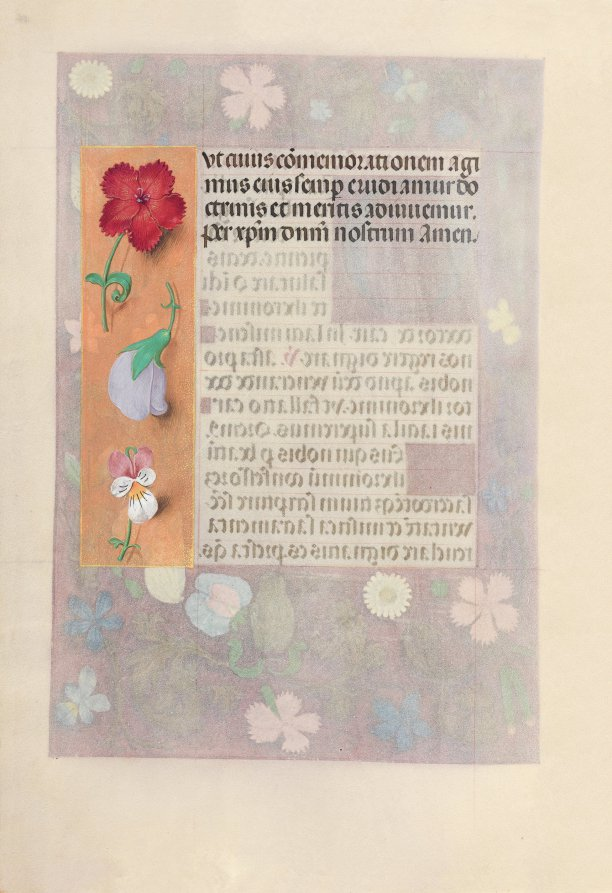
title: Hours of Queen Isabella the Catholic, Queen of Spain: Fol. 186v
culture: Flanders, Ghent and Bruges, late 15th century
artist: Master of the First Prayerbook of Maximillian (Flemish, c. 1444–1519)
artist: and Associates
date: c. 1500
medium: ink, tempera, and gold on vellum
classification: Bound Volume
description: This manuscript was illuminated by a circle of at least five highly organized manuscript painters active in the Flemish cities of Ghent and Bruges. The principal illuminator was Alexander Bening, who painted the majority of the book's miniatures. Manuscripts produced by this circle of artists are renowned for the decoration of their borders, which typically feature a rich variety of realistically-painted flowers, birds, and butterflies. This prayer book, called a book of hours, was intended not for a cleric, but for the private devotions of a lay person-in this case, Isabella the Catholic, Queen of Spain (1451-1504). Isabella's coat of arms embellishes the book's frontispiece. It is unlikely that the book was commissioned by the Queen herself; rather, she probably received it as a diplomatic gift from someone courting her patronage, perhaps Cardinal Francisco Jimenez de Cisneros. A Franciscan friar, Jimenez was dependent upon Isabella for his advancement, first to the post of Queen's confessor in 1492, and then to Archbishop of Toledo in 1495.